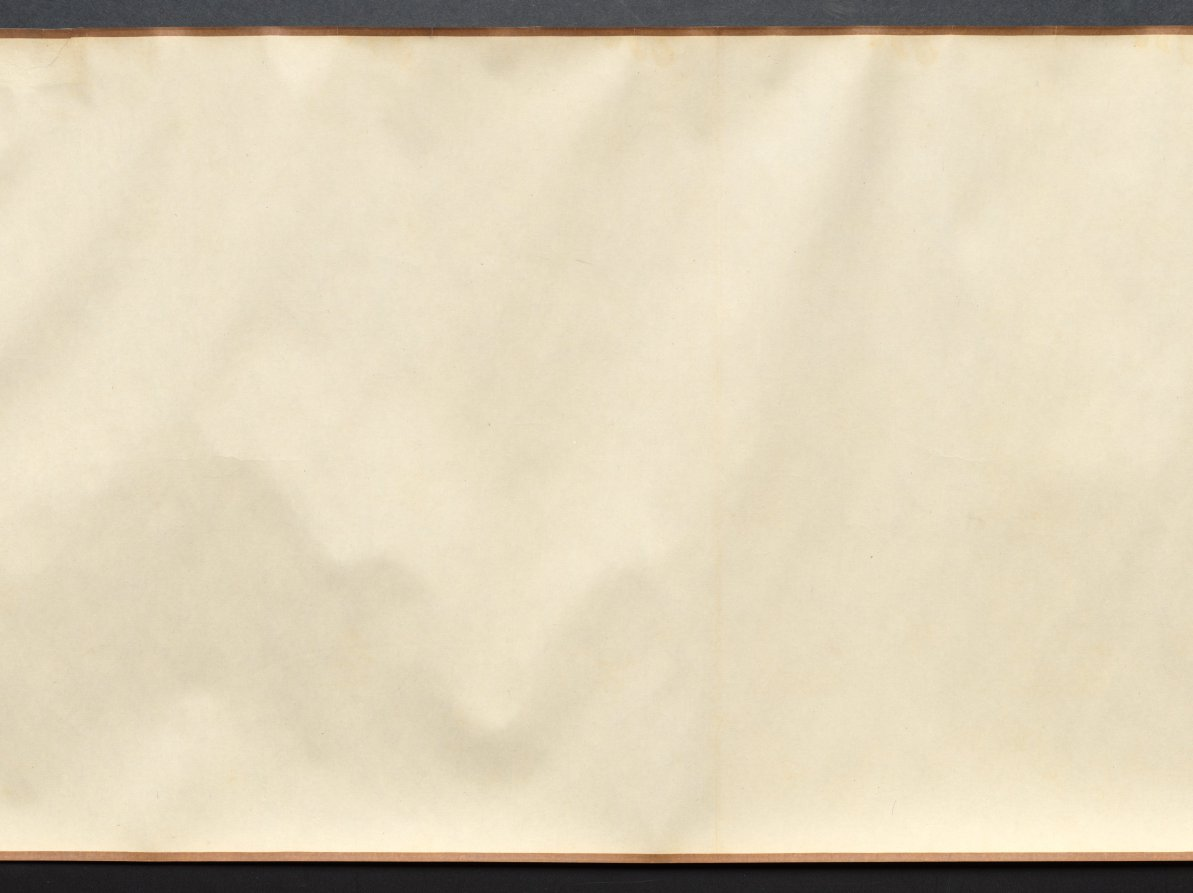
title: Returning to the Village in a Rainstorm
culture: China, Ming dynasty (1368–1644)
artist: Xie Shichen (Chinese, 1487–after 1567)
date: 1530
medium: Handscroll; ink and light color on silk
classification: Painting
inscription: 風雨歸村圖 嘉靖庚寅秋日樗仙謝時臣. [印] 謝時臣印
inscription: 3 additional seals unidentified.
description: This scroll depicts a wind- and rainswept landscape with figures in the countryside struggling against a late summer monsoon rainstorm. Such weather was familiar to residents of the lower Yangzi delta. Xie Shichen spent most of his life in the Suzhou area. Details of his career are scant, but his surviving works suggest that he made his living as a professional painter. This painting conveys drama and anecdotal observations, characteristic of Zhe school paintings, such as the one by Lü Wenying, CMA 1970.76.